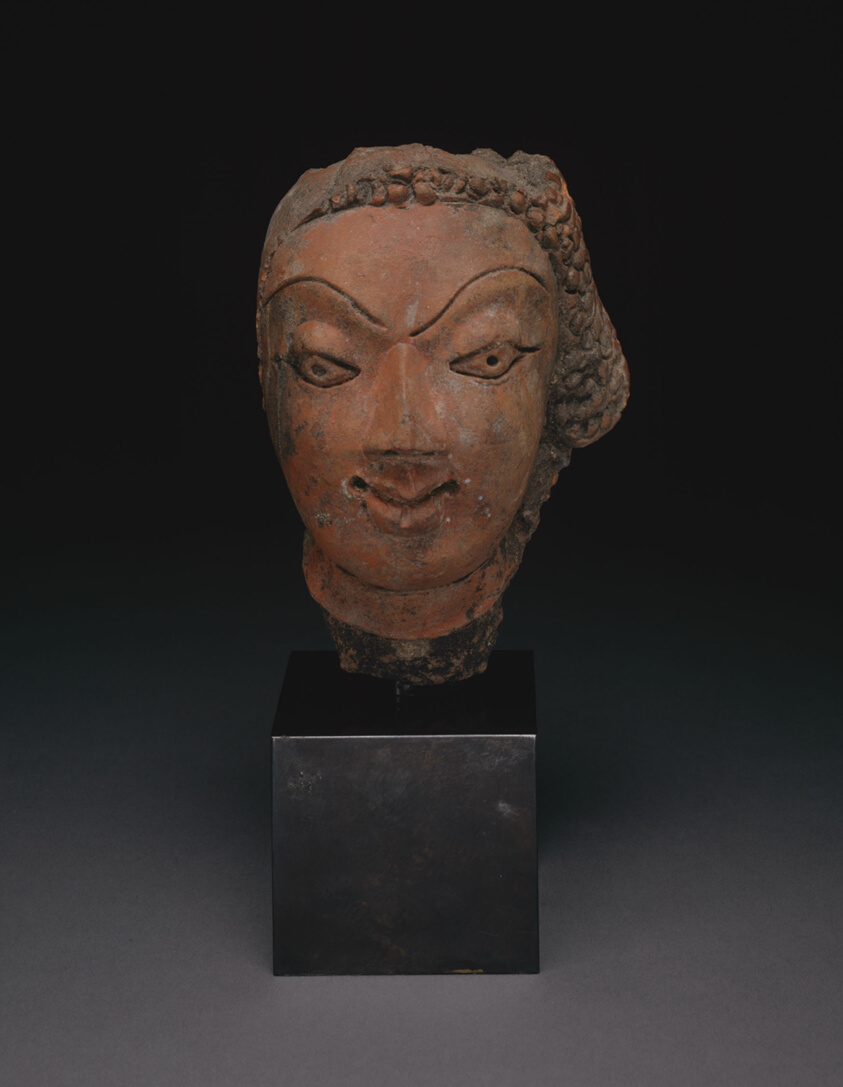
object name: Sculpture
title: Male Head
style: South Asian, gupta, Indian (South Asian), asian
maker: India; Uttar Pradesh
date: Gupta period, 4th/5th century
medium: Terracotta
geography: Uttar Pradesh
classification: earthenware; ceramics; sculpture; asian art